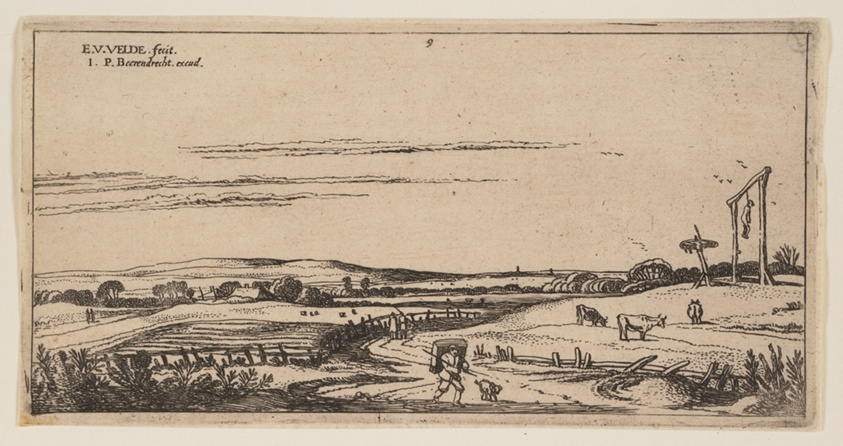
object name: Print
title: Landscape with Gallows (near Haarlem), from Landscapes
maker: Esaias van de Velde; Dutch, 1587–1630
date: c. 1610-1630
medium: Etching on ivory laid paper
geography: Netherlands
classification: etching; paper; print; prints and drawing